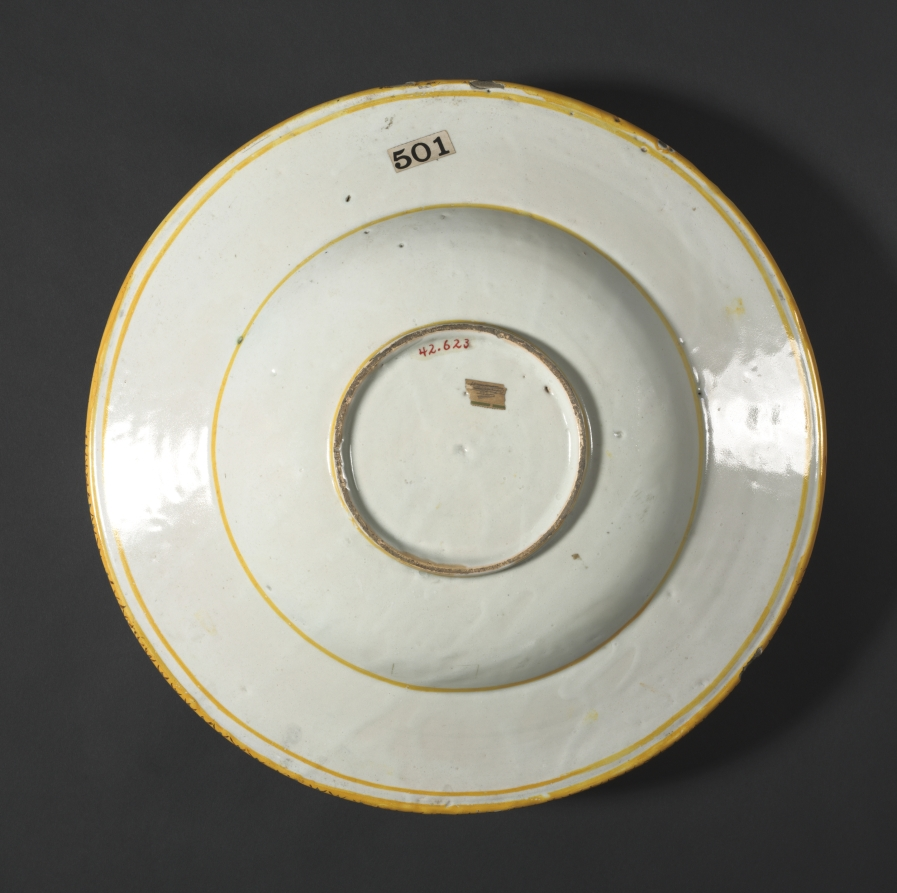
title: Charger Depicting a Boar Hunt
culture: Italy, Urbino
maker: circle of Fontana Family (Italian)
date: c. 1575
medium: tin-glazed earthenware (maiolica)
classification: Ceramic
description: During the Renaissance, an understanding of classical antiquity was perceived to be a sign of social, intellectual, and economic distinction. Scenes from Greco-Roman mythology were prominently featured on maiolica, covering the surface in a style called istoriato (decorated with stories).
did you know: In the centuries leading up to the Renaissance, boar hunting was an activity reserved for royalty and the aristocracy.